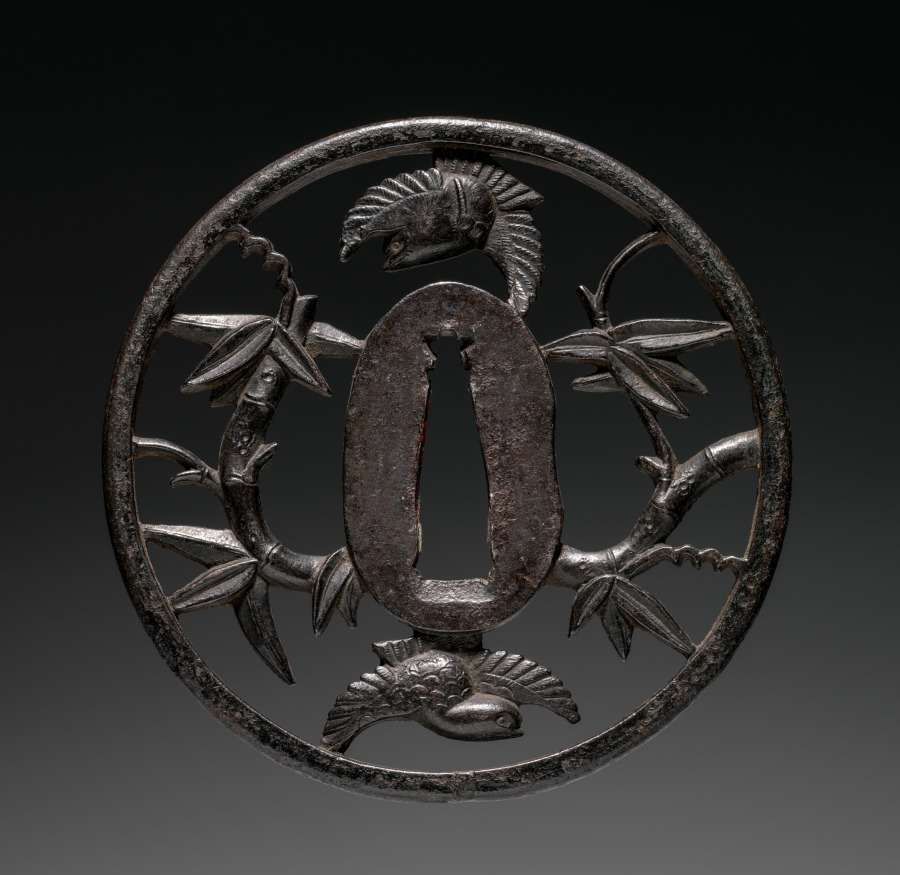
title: Sword Guard (Tsuba) with Birds in Bamboo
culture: Japan, possibly Edo period (1615-1868)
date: c. 1615–1868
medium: iron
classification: Arms and Armor